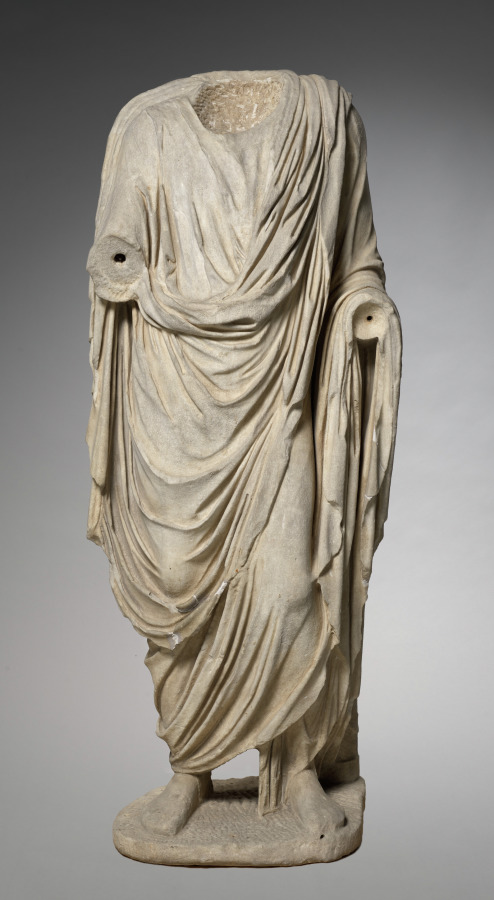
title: Togatus Figure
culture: Italy, Roman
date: 1–200 CE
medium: pentelic marble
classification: Sculpture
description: From 1929 until 1973, this toga-clad body was displayed with a portrait head of Vespasian (recarved from Nero) that did not originally belong to it. Several details indicate a mismatch: the surfaces and proportions differ, and the head projected awkwardly forward even after modern recarving of the neck to fit into the body cavity. Aspects of the toga also suggest that it was sculpted later than the head.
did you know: This body once included a separately made head and arms.